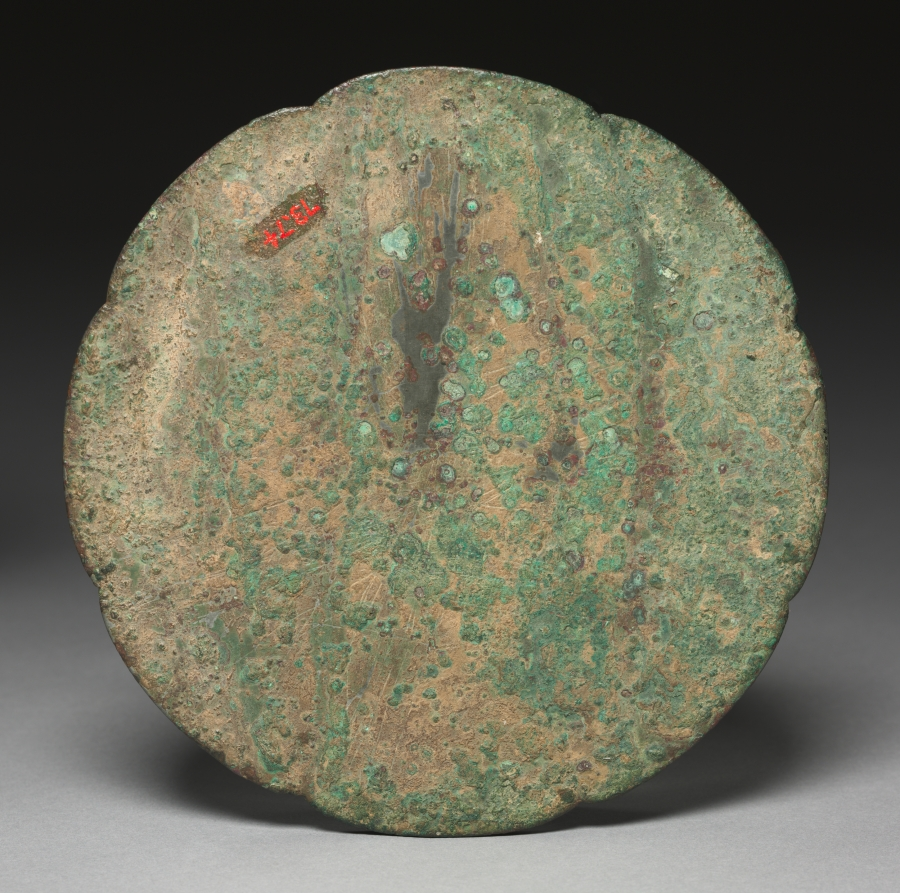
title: Mirror with Phoenixes, Birds, Butterflies, and Floral Sprays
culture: China, Tang dynasty (618-907)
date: 700s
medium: bronze with silver and gold inlaid lacquer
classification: Metalwork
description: This extremely rare pingtuo mirror is coated with a lacquer base inlaid with paper-thin sheets of silver and gold. The decorative patterns, especially the floral arabesques and the phoenixes and birds holding branches in their mouths, have a pronounced Persian and Central Asian flavor. Luxury items like this had been used by the Tang emperor as diplomatic gifts. A similar example from the Japanese imperial collection of Emperor Shōmu was donated by Empress Kōmyō in 756 to the Shōsō-in repository of the Tōdai-ji Temple, Nara, Japan.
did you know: Mirrors like this have a polished side for viewing and a decorated side with a central knob for lifting.